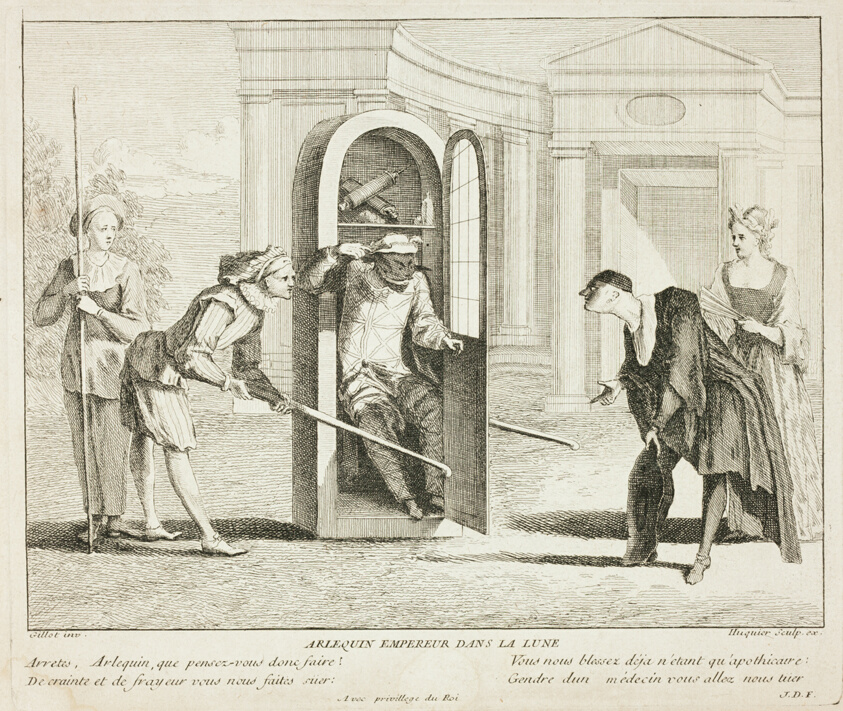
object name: Print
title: Plate from Livre de Scènes Comiques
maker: Gabriel Huquier (French, 1695-1772); after Claude Gillot (French, 1673-1722)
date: 1729/32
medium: Etching on paper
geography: France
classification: etching; print; prints and drawing